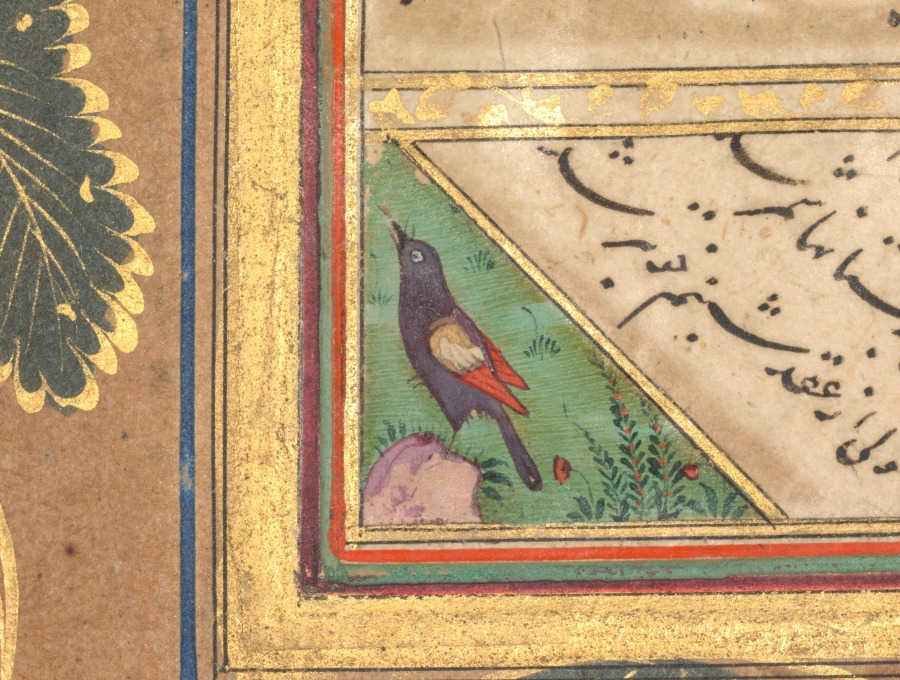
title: Illuminated page (verso), from a Panj Ganj (Five Treasures) of Abd al- Rahman Jami (Persian, 1414–1492) with two Persian masnavis: Yusuf va Zulaykha (Joseph and Zulaykha) and Khirad-nama-i Iskandari (Alexander’s Book of Wisdom)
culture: Western Afghanistan, Herat (text); Mughal India (paintings)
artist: Mushfiq (Indian, active early 1600s)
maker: Sultan 'Ali al-Mashadi (Iranian, 1430–1520)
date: 1603–7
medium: Gum tempera, ink, and gold on paper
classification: Painting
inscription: [[Persian title in gold, nasta’liq script]] Khirad-nama-I Iskandari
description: This section of text from Jami’s poem of Joseph and Zulaykha, written diagonally in the margins, describes the beauties of Zulaykha’s house, in which she intends to seduce Joseph. It includes the following verses: Jeweled lamps on the walls were hung / And odorous herbs were beneath them flung. / She gathered together all things most fair, / And unrolled the carpet of pleasure there. / But amid the charms of the sumptuous hall / She longed only for Joseph, far dearer than all. / A heavenly palace is dark and dim / To a lover whose darling is far from him. The longing of Zulaykha for Joseph metaphorically describes an imperfect devotee’s mystical love for God. With patience, forbearance, and virtuous actions, unification with the divine will eventually occur, even for the most flawed among us. On this page also begins the Khirad-nama-i Iskandari (Alexander’s Book of Wisdom), another of the five narrative poems that make up the Panj Ganj.